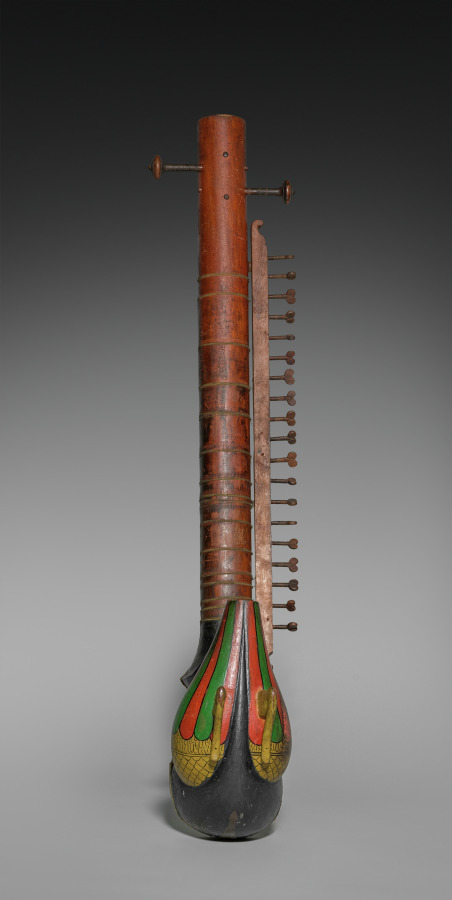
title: Taus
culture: India, Punjab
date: c. 1800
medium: Polychromed wood, parchment, bone or ivory, gut, and metal strings; frets: bronze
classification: Musical Instrument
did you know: The taus was designed by a Sikh Guru to combine the sounds of string instruments and the plaintive cry of the peacock.